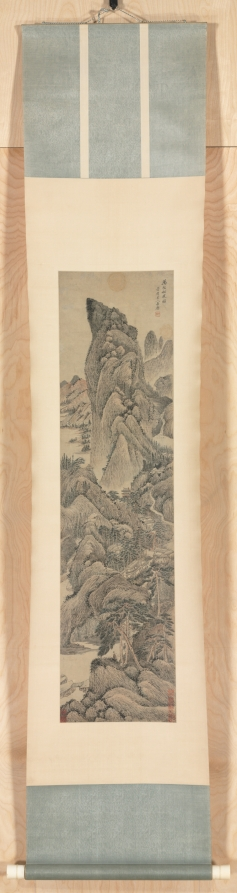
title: Pine Wind from Myriad Villages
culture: China, Qing dynasty (1644-1911)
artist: Wu Li (Chinese, 1632–1718)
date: late 1600s–1718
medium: Hanging scroll; ink and light color on paper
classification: Painting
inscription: Artist's title, signature, and 2 seals: Pine Wind from Myriad Valleys. Mojing daoren Wu Li.[seals] Mojing daoren; Wu Li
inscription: 5 additional seals: 2 of Fang Guancheng 方觀承 (1698–1768); 1 of Ma Chi-tso (1900s); 2 unidentified.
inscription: Two seals of the Qianlong emperor [r. 1736–95], probably authentic, were believed spurious and removed by a previous owner.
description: Wu Li, a native of Jiangsu province, was a talented painter, poet, and calligrapher. He studied painting with Wang Jian (1598–1677) and Wang Shimin (1592–1680), two of the “Four Wangs,” leaders of the Orthodox school of painting in the early Qing period. Through them, he also absorbed styles of earlier Ming dynasty masters. Wu was highly praised by his contemporaries and his paintings were in demand, but his interest in philosophy and religion curtailed his painting activities later in life. Wu Li converted to Christianity and in 1688 was ordained as one of the first 3 Chinese Jesuit priests. He spent the final 30 years of his life primarily in missionary work with the poor. Although this painting is undated, the sooty blackness of the ink tones and the easy self-confidence with which they are set down on paper echo recognized late works.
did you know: A figure carrying a qin, zither, walks between the buildings, perhaps intending to play music for the two men seated beneath the pines.